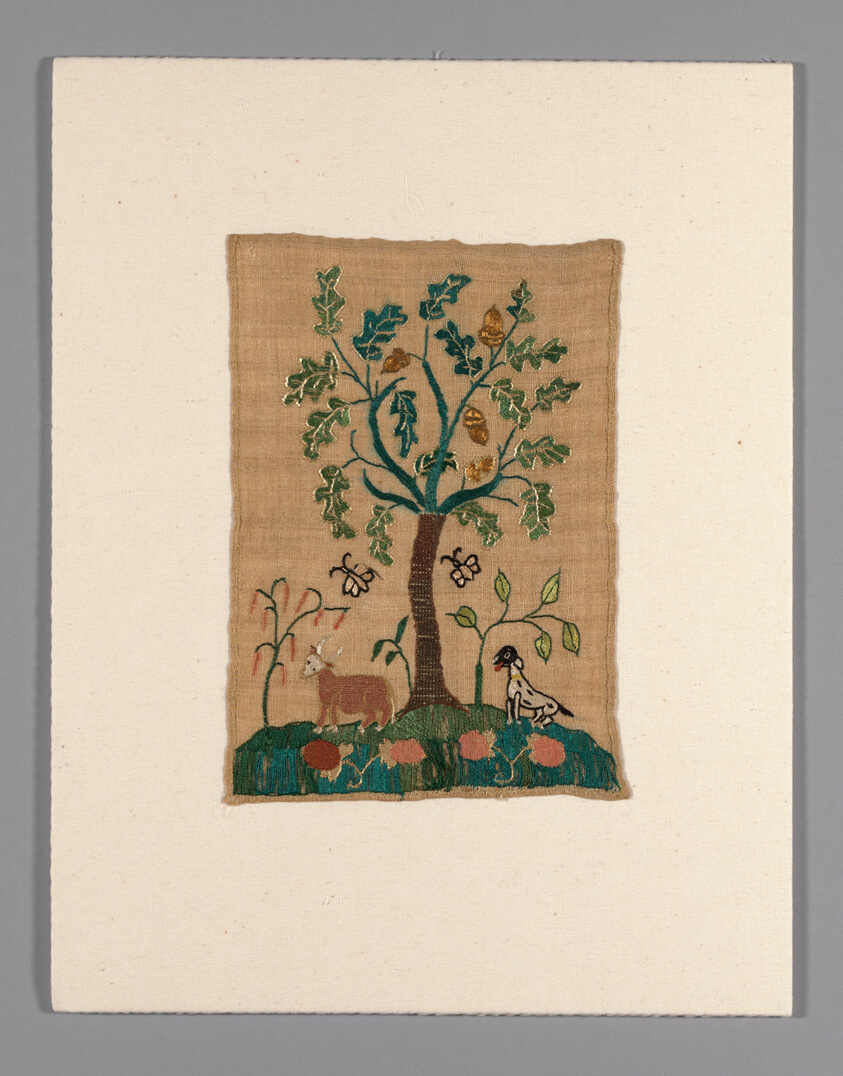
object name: Textile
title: Sampler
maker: United States, probably Massachusetts, Newburyport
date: 1775/1800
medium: Linen, plain weave; embroidered with silk in cross, Romanian, satin, and stem stitches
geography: Massachusetts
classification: textile; needlework (visual works); sampler